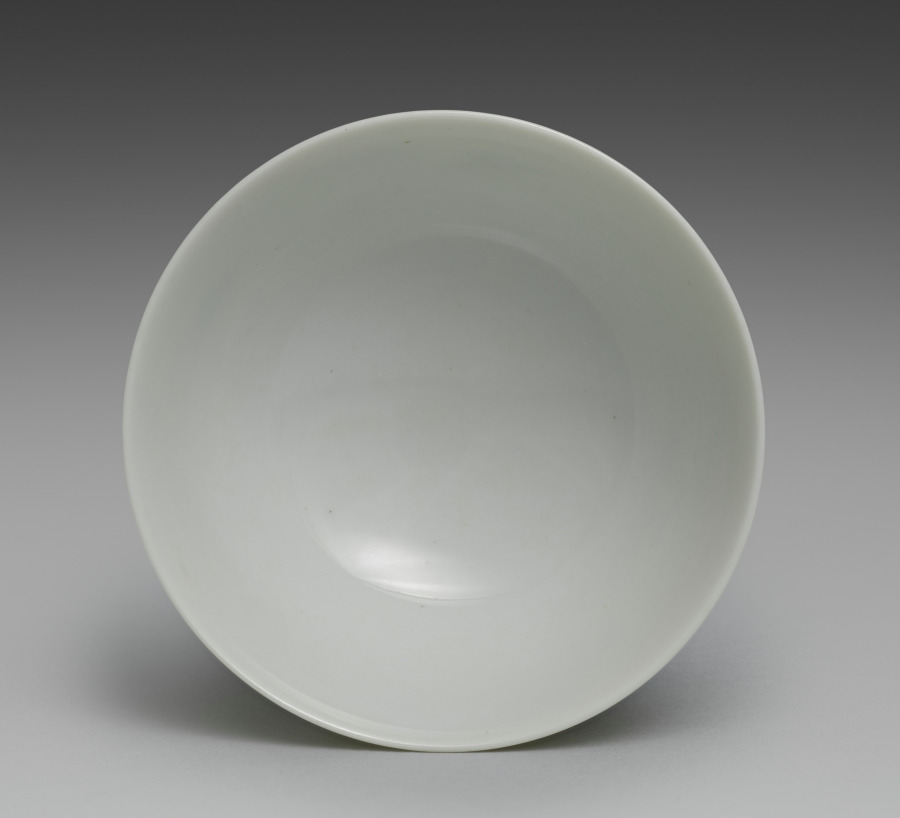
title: Teabowl from Teabowls with Peony and Crabapple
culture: Japan, Meiji period (1868–1912)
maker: Seifū Yohei III (Japanese, 1851–1914)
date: 1893–1914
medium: One from a set of five teabowls; porcelain with underglaze and overglaze color enamels and gold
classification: Ceramic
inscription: 清風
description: Overglaze color enamels are generally called iro-e (literally “color picture”) in the terminology customarily used for porcelain decoration of the Edo period. This set of teabowls is a fine example of Yohei III’s skilled use of the technique, which is identified on this set’s box lid with the alternate phrasing “porcelain with color painting” (jisaiga). Distinct from the way overglaze colors were used in Kakiemon ware from Arita, his designs and applications show a consciousness of porcelain decoration of the Qing dynasty. Here, he combines Chinese models with a sensibility taken from Kyoto ware precedents, including painting with powdered gold (kinrande). The colors used in the bowls are as follows: blue, black, gold, white, light green, green, and pink. The blue appears only inside the footring, as a double band of underglaze color. The black iron, used for stems and leaf veins, is painted over the glaze. The gold, also painted over the glaze, is used for leaves and the centers of flowers, for solid, glossy lines defining detail, or as a semimatte ground. Yohei has incised lines of varying widths into the pigment, carving away to the bowl’s surface, to differentiate individual petals and their rippled shapes. The light and dark greens, as well as the pink, are painted over the glaze. Of note is how Yohei has first used thinly applied lines of light green to draw the plum branch before applying the opaque iron black. For the plum buds and flowers, he has used a diluted pink with an opaque pink for outline, both over the glaze. In his later works, Yohei used pink both over and under the glaze in a manner similar to underglaze blue, and it can be challenging in some cases to discern which technique he has used. A lidded container in a private collection has a similar design but is augmented with the inclusion of white and purple magnolia blossoms. In contemplating the original decorative program of a set, of which these teabowls may have been a part, it is worth considering that perhaps not all objects included the full range of motifs. In such cases, the composition of the individual object may be best understood within the context of the extended ensemble. Here, the delicate pink plum on one side of the bowl seems slightly unbalanced with the bold white peony on the other, but when seen with other objects with the magnolia and its additional colors and shapes, it is possible to imagine a set with a complex, balanced design across multiple pieces.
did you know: The white of the peony flower is built up to a low relief over the glaze.